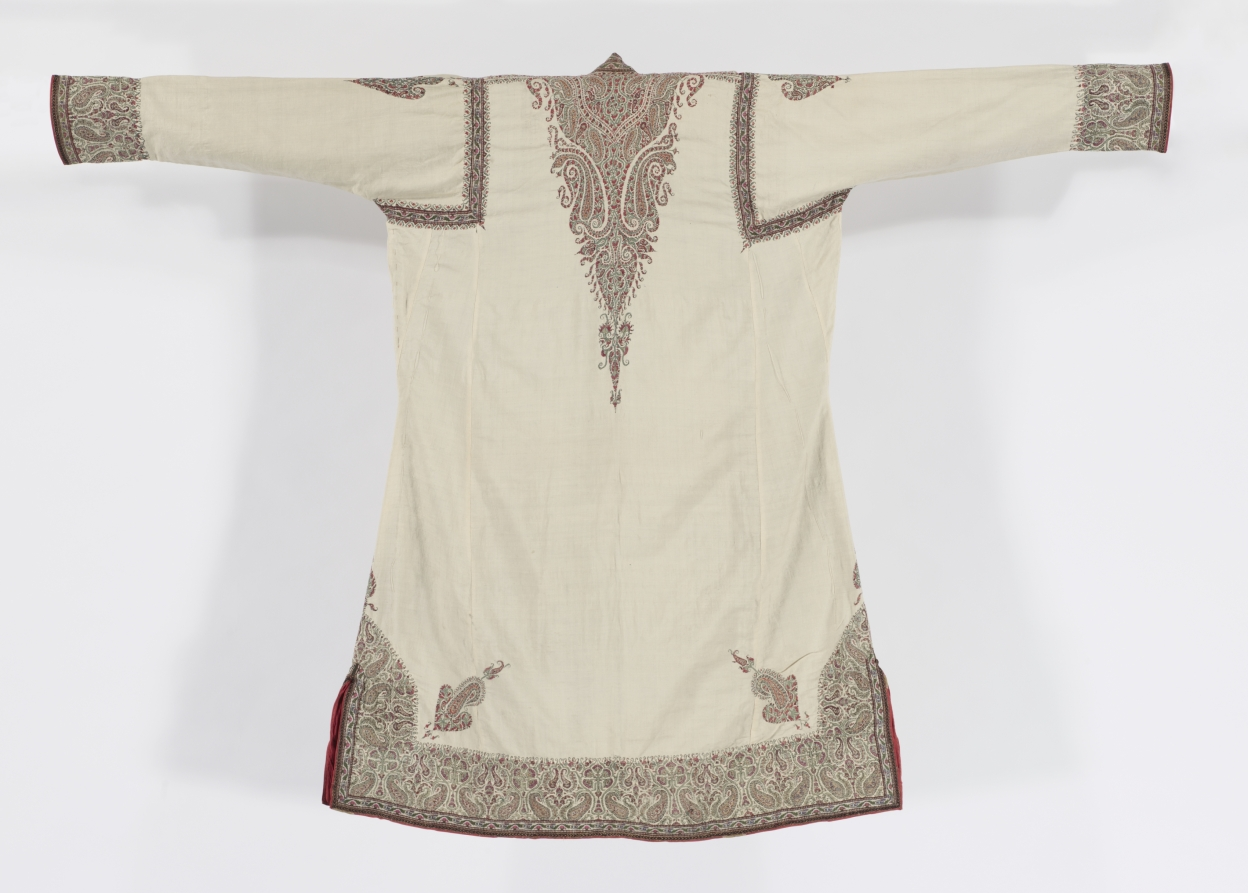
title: Coat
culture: India, Kashmir and probably Avadh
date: early 1900s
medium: wool: embroidery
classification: Garment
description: Coats with a band collar, fastened at the waist, have a Central Asian origin and are known by the Turkish term choga, meaning “long-sleeved garment.” During the mid-1800s, it was fashionable for Indian men of high social status to wear chogas as their outermost layer. The intricate ornamentation in the form of stylized unripe mangoes and flowering plants is the specialty of artisans in Kashmir, where they had access to the fine wool of Himalayan goats. The coats, however, were popular in many regions throughout India.